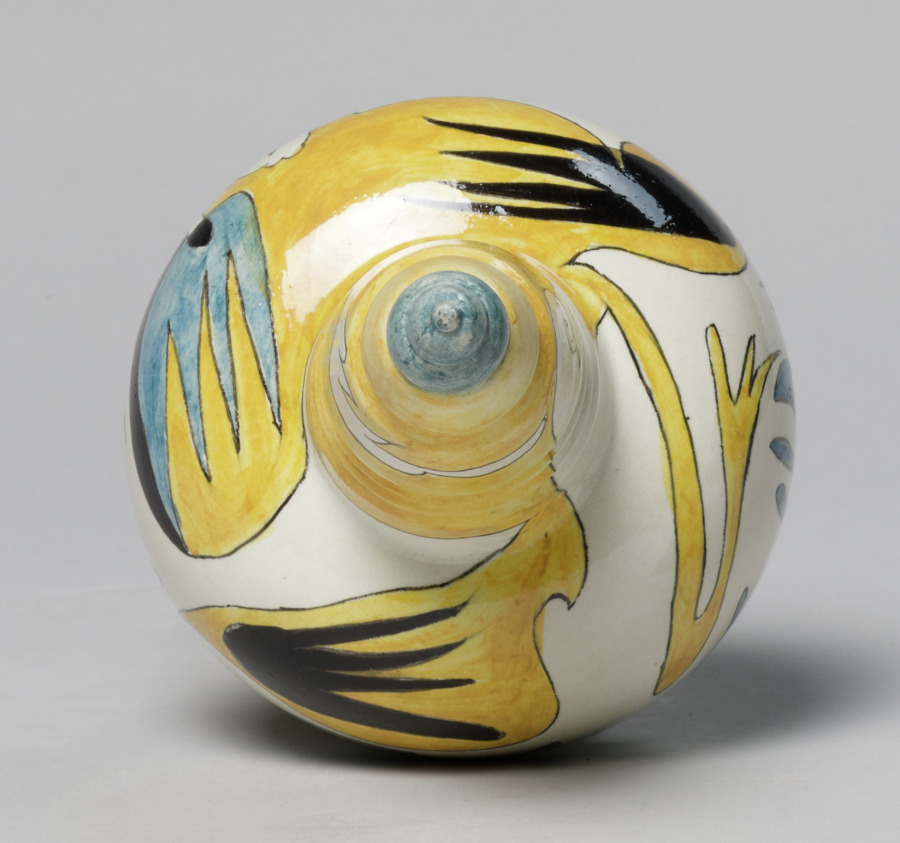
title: Lid for a Jar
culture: Netherlands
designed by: Theodorus A. C. Colenbrander (Dutch, 1841–1930)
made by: Rozenburg Factory (Netherlandish)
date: 1885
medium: earthenware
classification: Ceramic